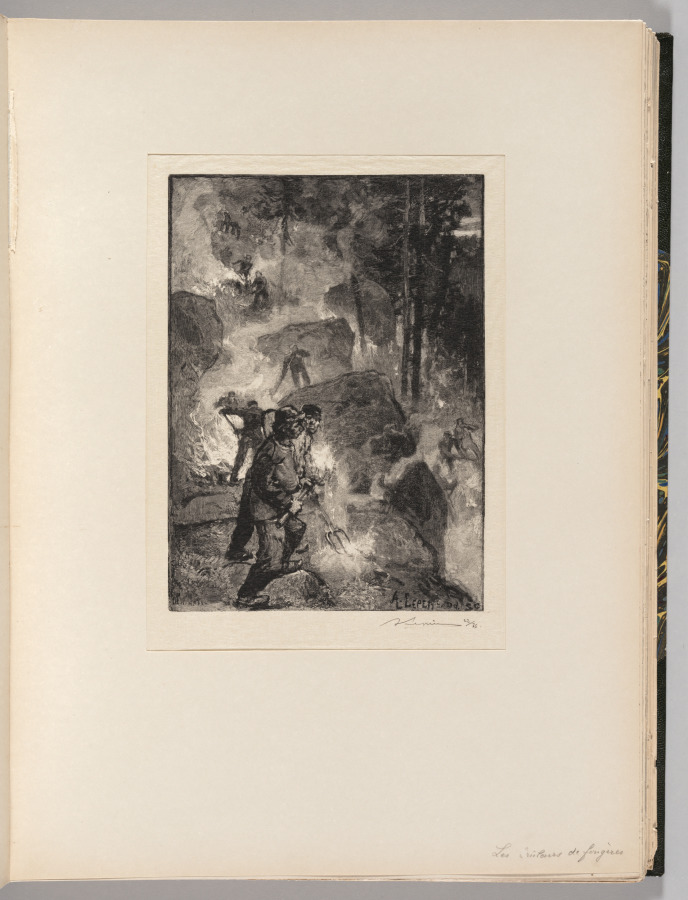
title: Fontainebleau Forest: Fern Burners (La Forêt de Fontainebleau: Les brûleurs de fougères)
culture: France, 19th century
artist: Auguste Louis Lepère (French, 1849–1918)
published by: A. Desmoulins, Published in Revue Illustrée, 1887–90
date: 1890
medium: wood engraving from bound volume of 34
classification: Bound Volume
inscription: Below image, lower right, in black ink: ALepère 22/35; in block, lower right: A. LEPÈRE / Del. sc; on window mat, lower right, in graphite: Les brûleurs de fougères